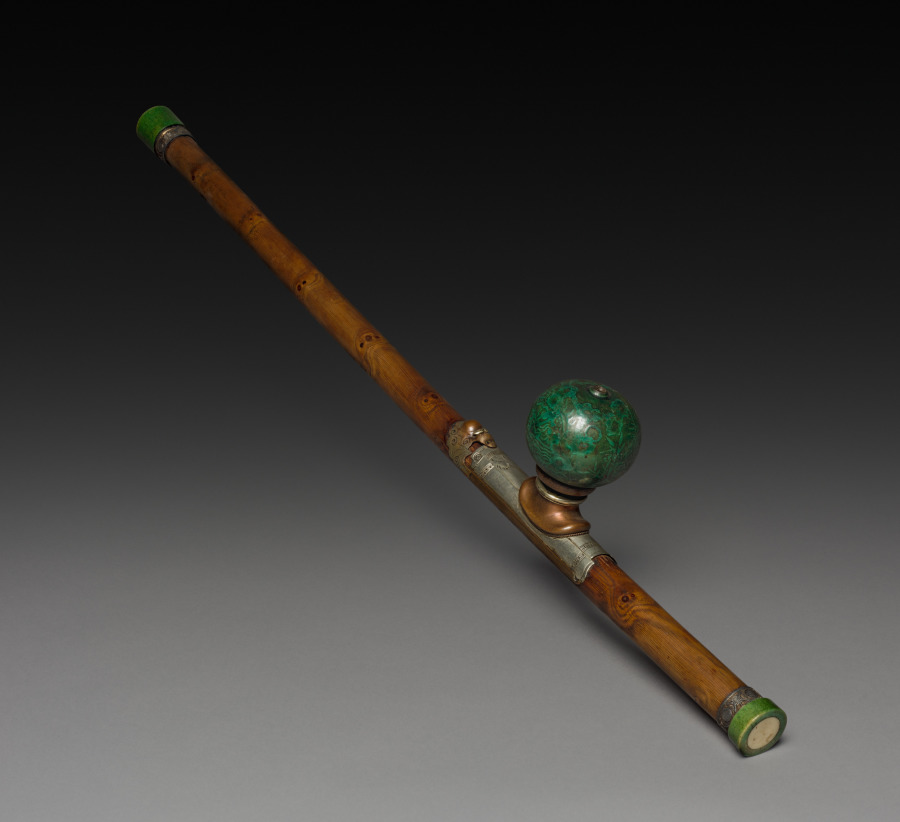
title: Opium Pipe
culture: China, Qing dynasty (1644-1911)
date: 1800s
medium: wood stem decorated with bronze and silver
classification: Miscellaneous